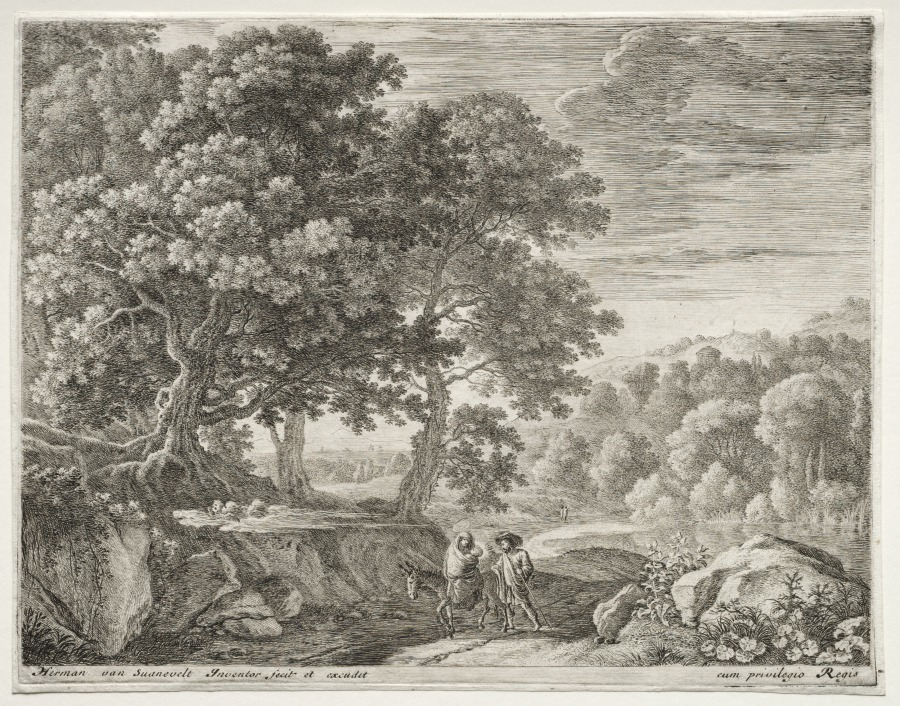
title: The Flight into Egypt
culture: Netherlands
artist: Herman van Swanevelt (Dutch, c. 1600–1655)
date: c. 1652–54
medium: etching and engraving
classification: Print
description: This series by Herman Swanevelt, The Flight into Egypt, illustrates an event from the New Testament of the Bible. Joseph, Mary, and Christ fled into Egypt to escape King Herod's persecution. Traditionally represented as a single image, Swanevelt enlarged the story into four scenes. The Holy family is first shown traveling with three angels behind them, then Joseph helps Mary off the donkey, next Joseph leads the donkey to water as Mary changes the child, and finally the family is at rest. However, the main focus of each of these prints is the depiction of landscape, a genre that reached unprecedented levels of popularity during the 1600s. The scenery, looking much more like the Italian countryside than Egypt, was inspired by Swanevelt's paintings. Although he was Dutch, he spent most of his career in Paris and Rome. As a painter, he was known for his ability to convey warm, glowing sunlight, a quality also found in his etchings.